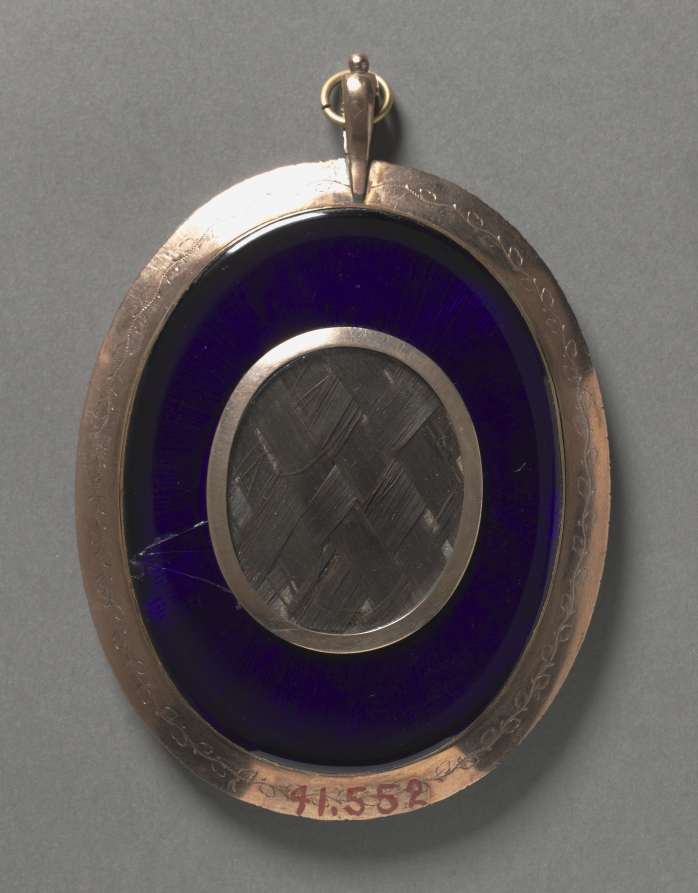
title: Portrait of Catherine Clemens and Her Son, John Marcus Clemens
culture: England, 19th century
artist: Richard Cosway (British, 1742–1821)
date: c. 1800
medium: watercolor on ivory in a gold and split pearl frame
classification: Portrait Miniature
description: This sensitive portrait of Catherine Clemens and her son, John Marcus, was painted around 1800 and exemplifies the prettiness for which Cosway was so well known. The artist’s trademark turquoise blue sky is reflected in the boy’s brilliant blue eyes and the bow on the frock that slips informally off his shoulder. This miniature also showcases Cosway’s mature technique of delicate stipplework throughout the faces, contrasted with looser brushstrokes for the hair and garments. Both John Marcus and his mother are swathed in white ruffled fabric, against which the paleness of their skin seems even more pronounced. Like his contemporaries, Cosway used the bare ivory ground to enhance the creaminess of flesh tones. John Marcus wears a coral necklace, frequently given to children during this period as a talisman believed to ward off illness. His innocent, childish gesture of reaching down his mother’s dress for her breast is awkward considering his disproportionately large size. The fact that he is still young enough to wear a gown rather than breeches suggests that he is under four years old, and yet his head and lips are larger than his mother’s. During the final decades of the eighteenth century, aristocratic women as prominent as the Duchess of Devonshire were electing to breastfeed their children rather than send them to wet nurses, and this may be a delicate reference to Catherine Clemens’s philosophy of “natural” parenting.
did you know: Portraits of mothers with their children were much more common in the 1700s and 1800s in Britain than were portraits of fathers with their children.